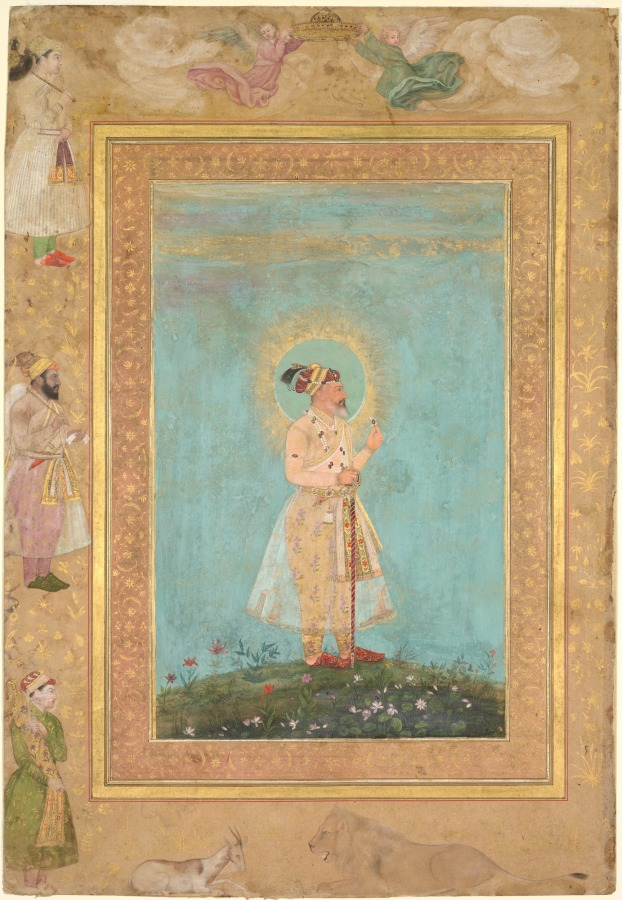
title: Shah Jahan holding a spinel and a long Deccan sword, from the Late Shah Jahan Album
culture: India, Mughal, 17th century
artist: attributed to Hashim (Indian, active 1598-c.1650)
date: c. 1650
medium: Gum tempera and gold on paper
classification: Painting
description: This page came from an imperial album assembled for Shah Jahan toward the end of his reign. Only portraits of the emperors have angels hovering with a crown in the top border along with the predator peacefully paired with his prey below. Shah Jahan chose to link these symbols of peace and justice with divine sanction for his rule, as indicated by the light of the sun and moon behind his head. Royal retainers carry emblems of sovereignty in the left border. Imperial Mughal painting reached a pinnacle of refinement and formality under Shah Jahan. The artists reveal astonishing skill in their ability to render the subtle texture of the feather in his turban crest, the gleam of every jewel, the softness of his beard, and the delicacy of his costly translucent muslin robe. In his hand Shah Jahan holds a ruby-like gemstone called a spinel, prized among the Mughals for its talismanic properties of protection during battle.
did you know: The finest fabric was the most transparent, like the Emperor’s New Clothes.